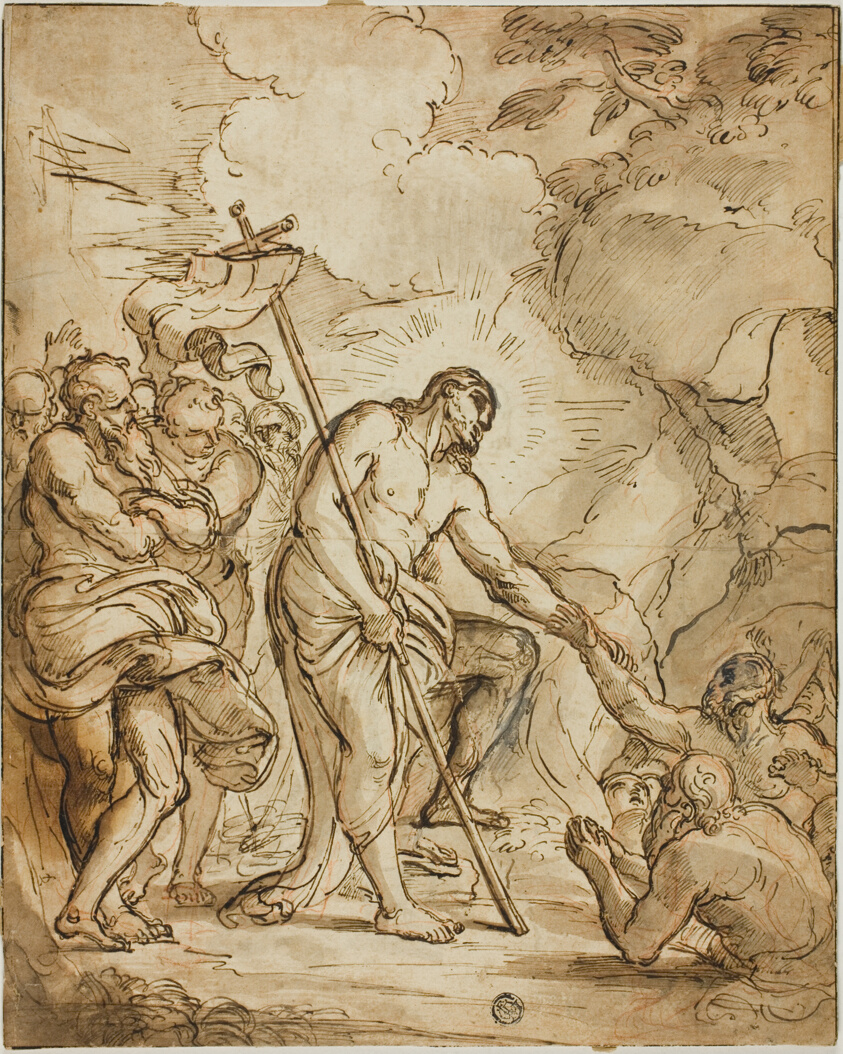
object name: Drawing and Watercolor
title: Descent Into Limbo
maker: possibly Style of Domenico Maria Canuti; Italian, 1620-1684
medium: Pen and brown ink with brush and brown wash, over red chalk, on ivory laid paper, laid down on ivory laid paper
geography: Italy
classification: pen and ink drawings; drawings (visual works); prints and drawing